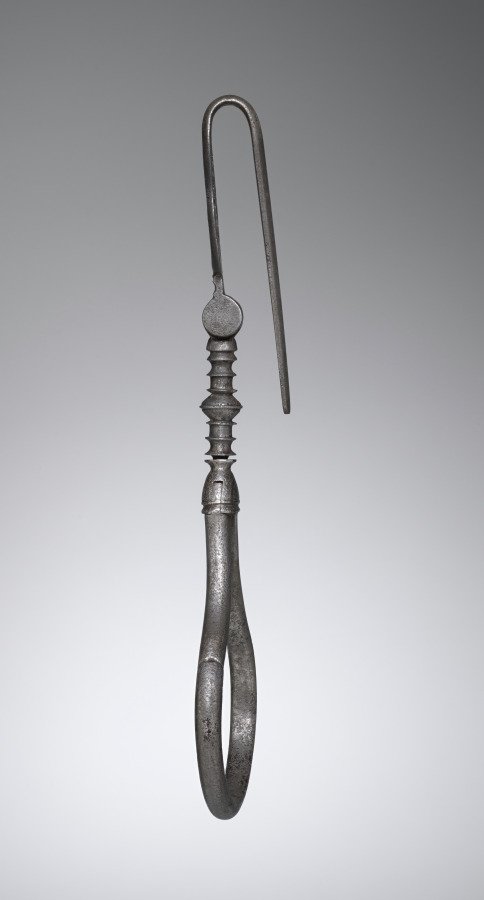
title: Carbine Hanger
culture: Italy, 17th century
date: 1600s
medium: steel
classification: Arms and Armor